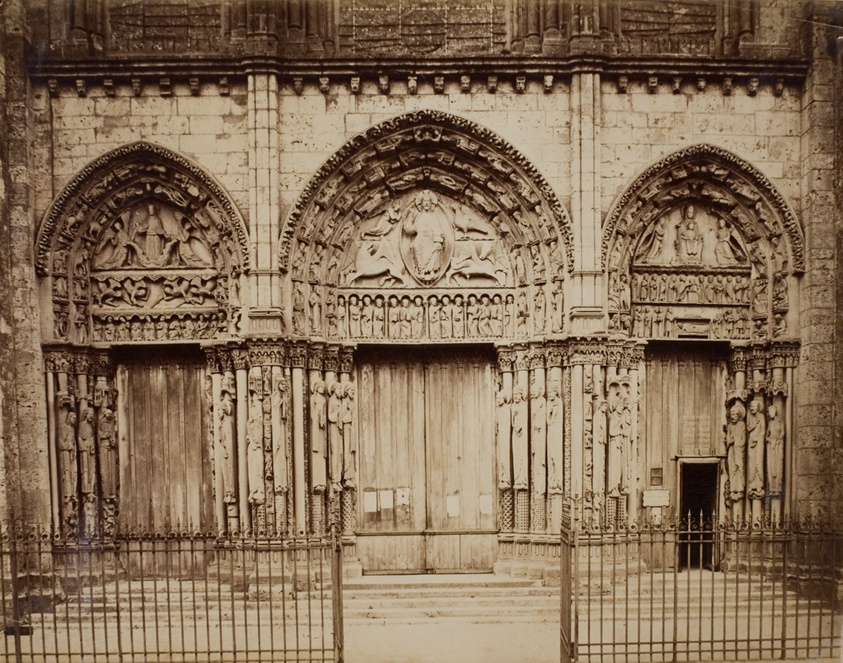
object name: Photograph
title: Untitled (Royal Portal of Chartres Cathedral)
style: 19th century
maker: Artist unknown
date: 1860s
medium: Albumen print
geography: Chartres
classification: photograph; albumen silver print; photography